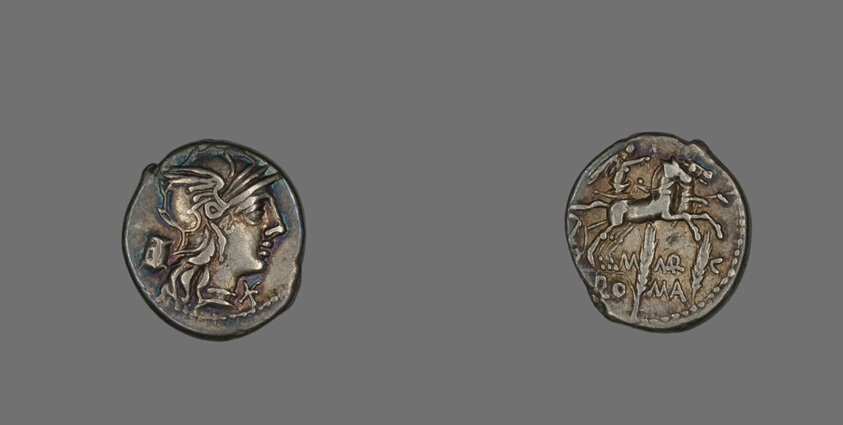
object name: Coin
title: Denarius (Coin) Depicting the Goddess Roma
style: republic period, ancient, roman (ancient, style or period)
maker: Roman, minted in Rome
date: 134 BCE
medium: Silver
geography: Italy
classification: coin; struck; ancient art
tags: goddesses, Chariots